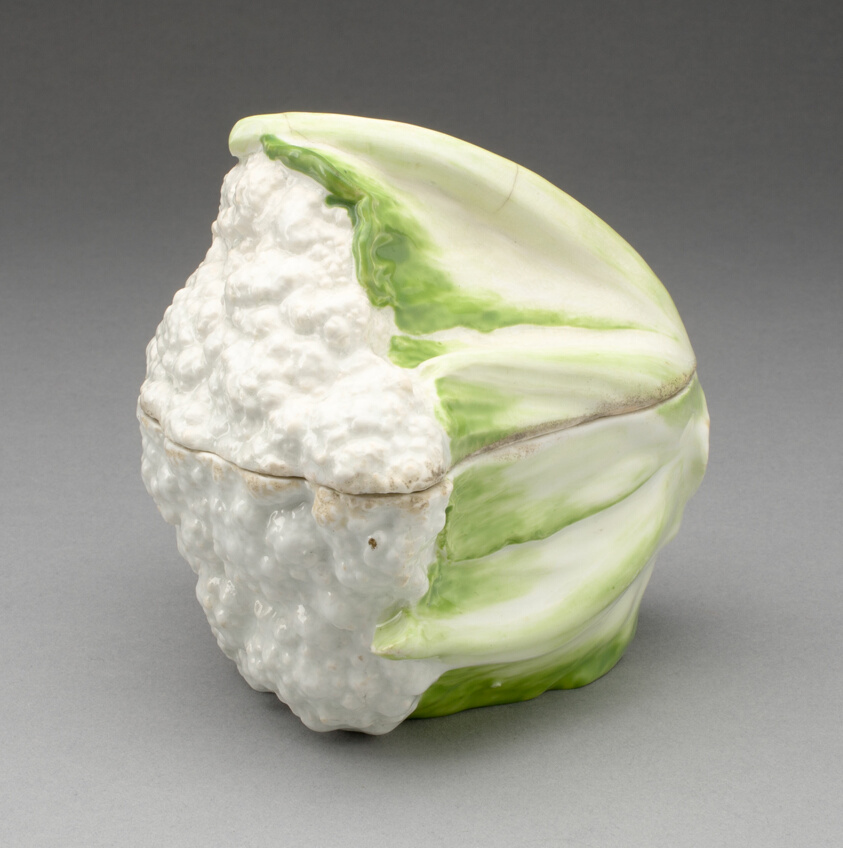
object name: Ceramics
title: Cauliflower Tureen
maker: Chelsea Porcelain Manufactory; London, England, c. 1745-1784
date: c. 1755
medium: Soft-paste porcelain, polychrome enamels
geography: Chelsea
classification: porcelain; european decorative arts; ceramics